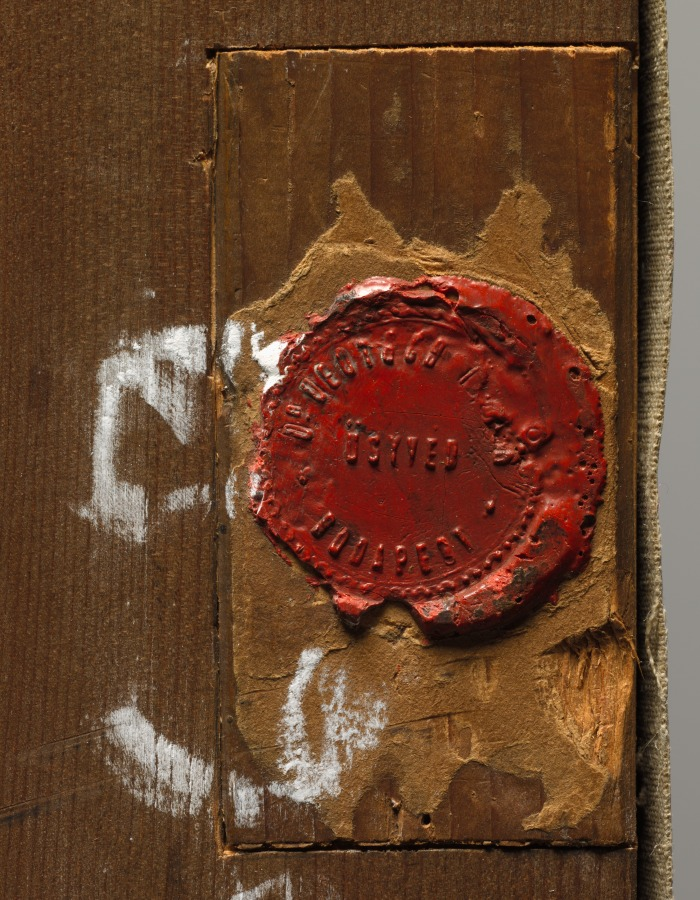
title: Countess Széchenyi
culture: Austria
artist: Ferdinand Georg Waldmüller (Austrian, 1793–1865)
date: 1828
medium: oil on fabric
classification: Painting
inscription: Signed below the parrot: Waldmül[. . .] 1828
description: This portrait typifies painting in Vienna between 1815 and 1865, an era known as the Biedermeier period, during which the Habsburg government promoted positive artistic depictions of Viennese life and culture. The mountains in the background express both the artist's romantic fascination with nature and patriotic devotion to his Austrian homeland. The sitter, Crescentia Seilern, was a prestigious member of the aristocracy who married Hungarian reformist patriot István Széchenyi.